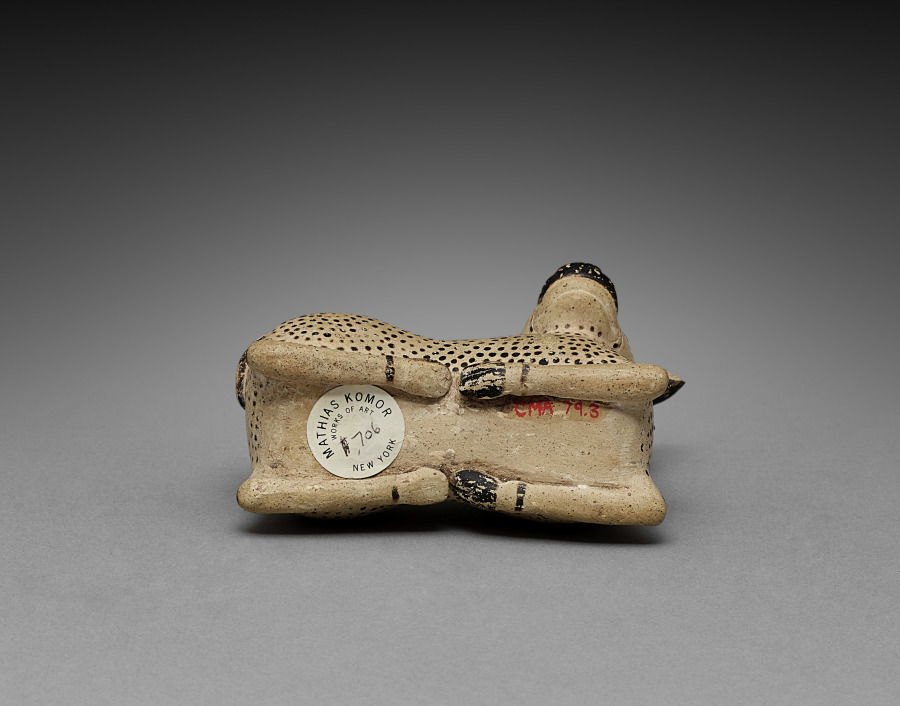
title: Oil Flask in the Shape of a Bull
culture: Greek, Corinthian or modern forgery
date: 600–575 BCE or 1900s CE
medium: ceramic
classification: Ceramic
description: This small bull-shaped flask is similar in form and painted decoration to a class of figure-shaped perfume vessels created during the late seventh and early sixth centuries BC in Greece and Italy (especially Corinth, Rhodes, and Etruria). The stippled body decoration characterizes such vases from multiple sites, while the light-colored clay and inconspicuous orifice placement are typical of Corinth. But no other reclining bulls are known among such vases (and only a few bullheads or upper bodies), raising questions about authenticity. A 1986 analysis determined that this object had been recently fired, and a 2020 clay analysis placed its origin in the Catalonia region of Spain, far from any known ancient production area for such flasks.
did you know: The curled tail masks a filling hole atop the back.